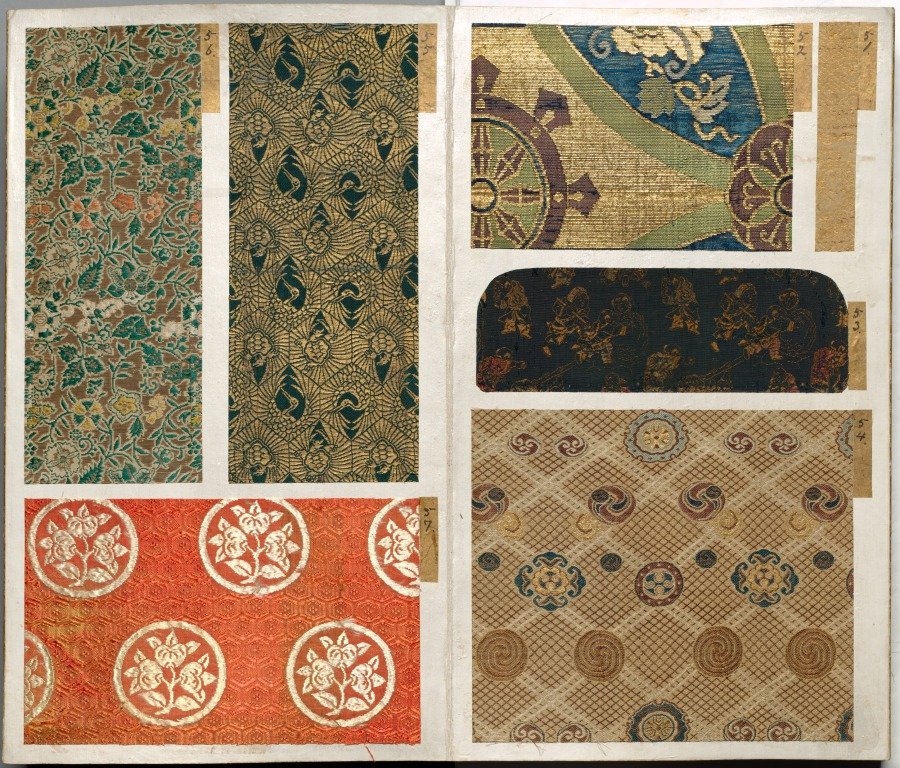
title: Album of Textile Samples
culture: Japan, Edo period (1615–1868)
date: 1600s-1700s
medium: silk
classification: Textile